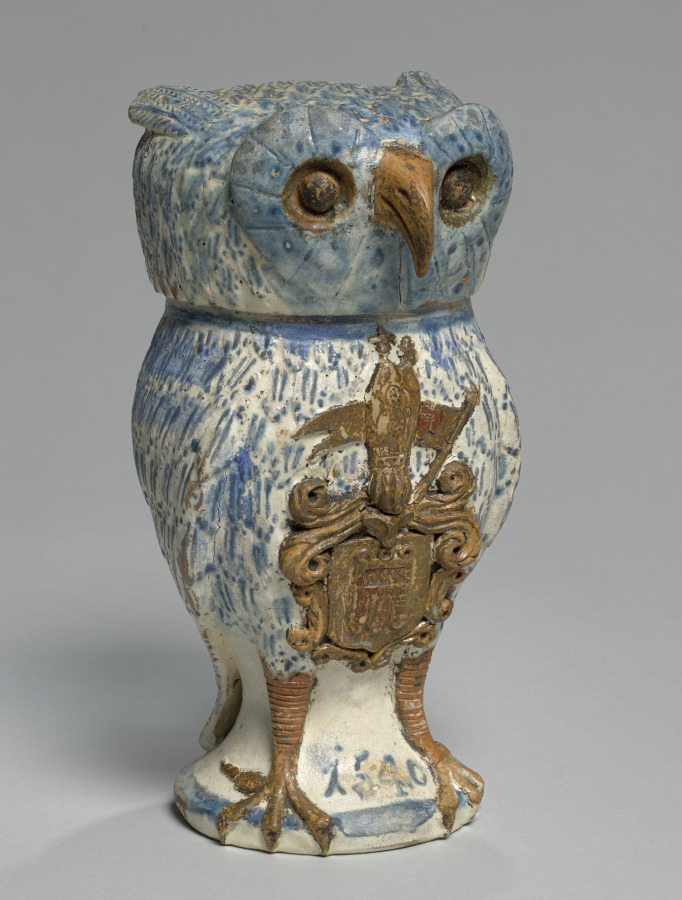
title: Owl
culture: Southern Germany, 16th century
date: 1540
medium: faience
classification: Ceramic